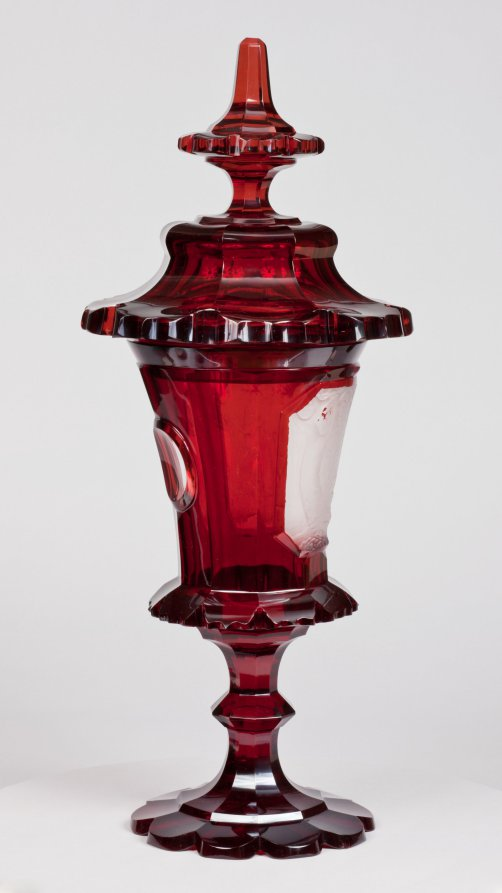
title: Covered Cup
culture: Bohemia, 19th century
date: mid-1800s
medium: ruby glass with engraved decoration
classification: Glass